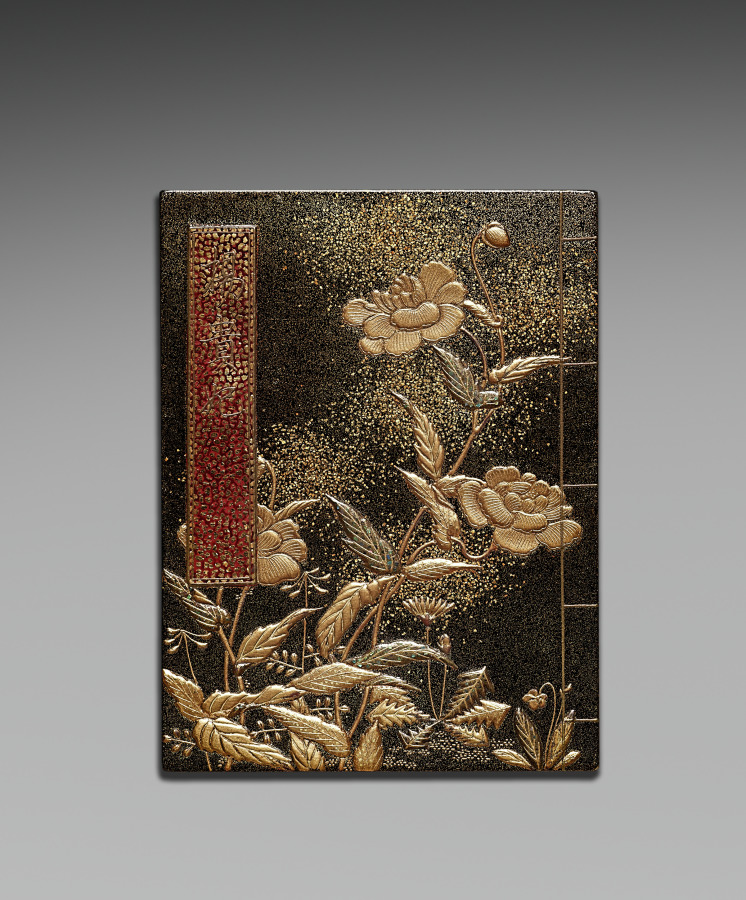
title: Nested Boxes with Chrysanthemums (inner box)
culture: Japan, Meiji period (1868–1912)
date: early 1900s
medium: lacquer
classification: Lacquer